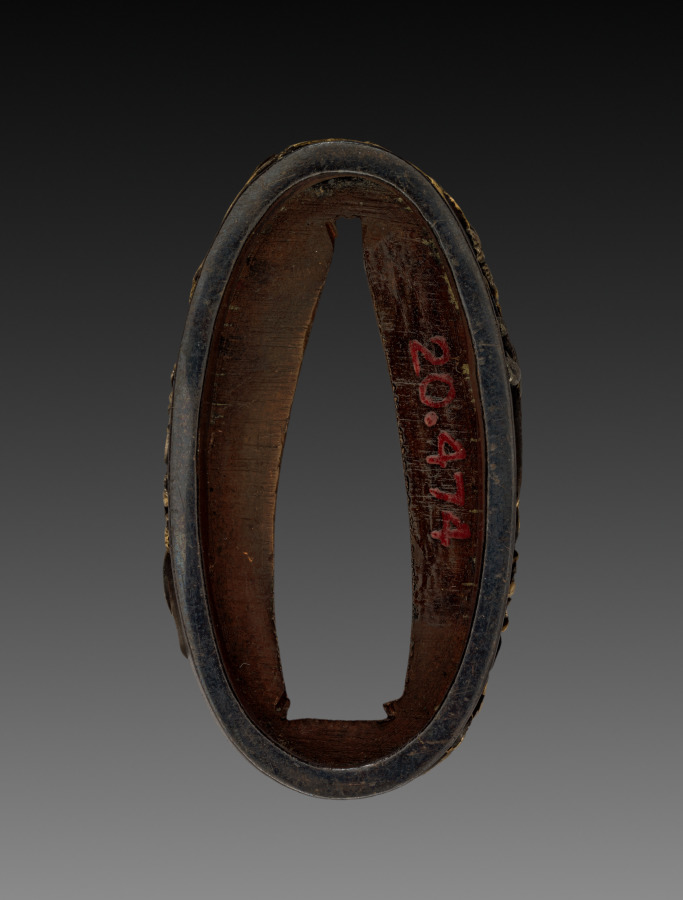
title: Sword-Hilt Collar (Fuchi)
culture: Japan, Edo period (1615–1868)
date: 1700–1850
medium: shakudo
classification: Arms and Armor